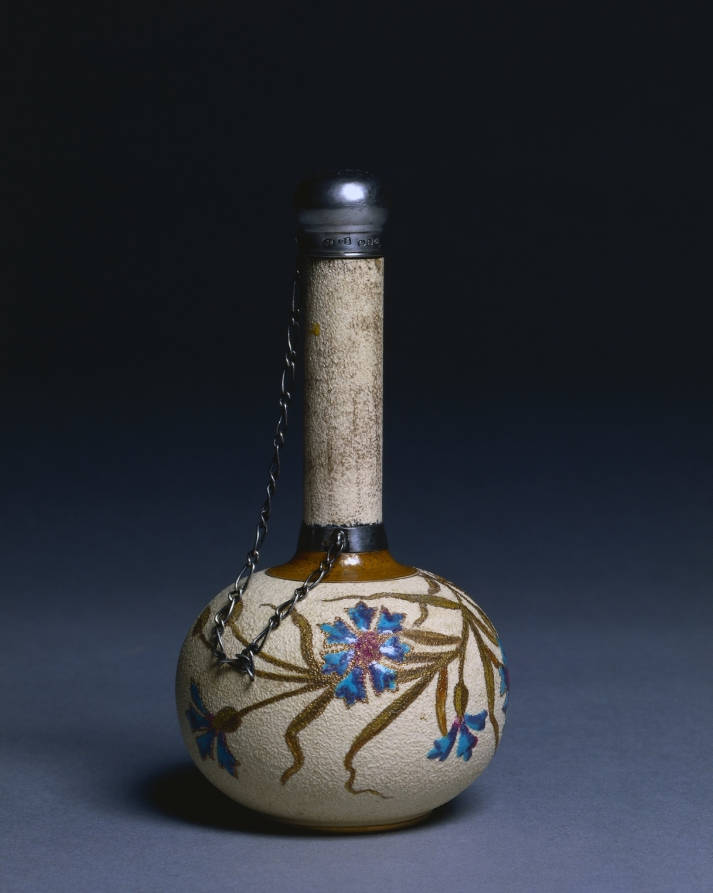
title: Perfume Bottle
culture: England, 19th century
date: c. 1888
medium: stoneware with silver mounts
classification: Ceramic